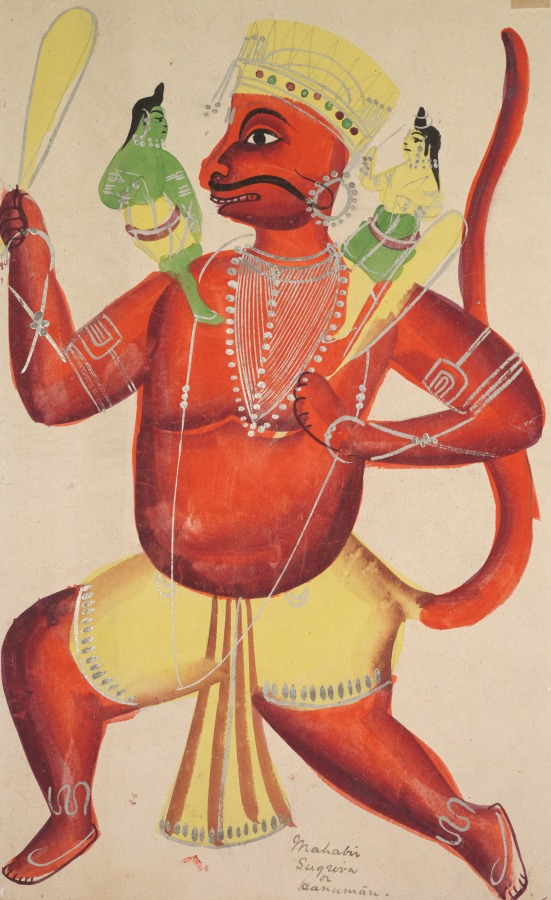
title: Hanuman with Rama and Lakshmana on his shoulders, from a Kalighat album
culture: Eastern India, Bengal, Kolkata, Kalighat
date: c. 1890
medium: Gum tempera, graphite, ink, and tin on paper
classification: Painting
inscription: [[recto, lower center, in English]] Mahabir Sugriva or Hanumān.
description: A simplified but bold color palette of orange, yellow, and green with silvery accents gives this image of Rama, Lakshmana, and their monkey ally Hanuman a sense of rhythm and urgency. Riding on Hanuman’s shoulders, the hero Rama—painted green—and his brother Lakshmana search for Rama’s abducted wife Sita. At the bottom of the painting, an informal scrawl contemplates the identification of the colossal figure as either the “Great Hero” Hanuman or Sugriva, but the image of a devoted tawny monkey carrying the two brothers unambiguously indicates Hanuman, Rama’s most faithful follower.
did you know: Hanuman can change his size and form at will, even making himself colossal in order to carry the two princes.